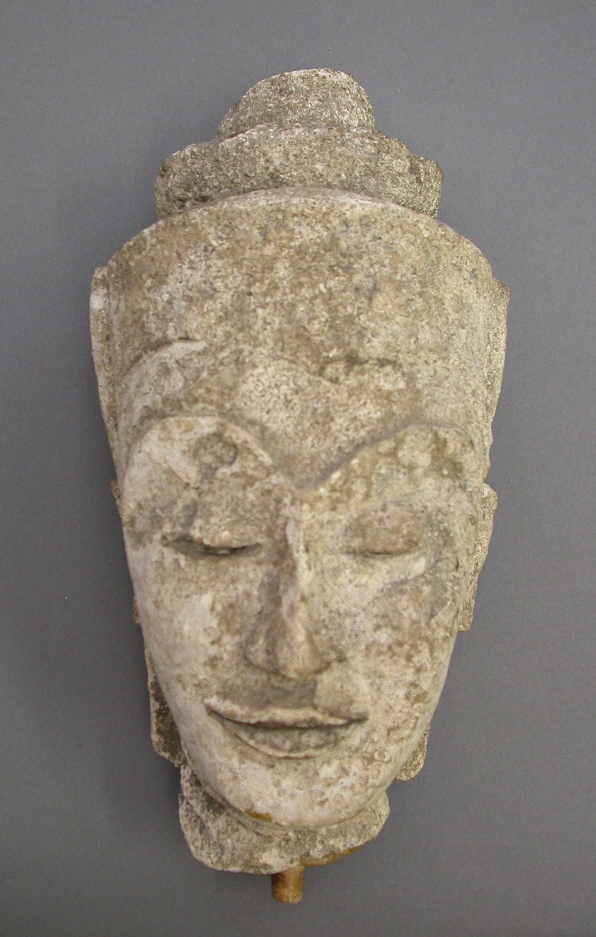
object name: Sculpture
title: Crowned Head of a Bodhisattva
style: Southeast Asian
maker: Thailand; Central Thailand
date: Ayutthaya period, late 17th century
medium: Stucco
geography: Thailand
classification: bust/head; stuccowork; sculpture; asian art